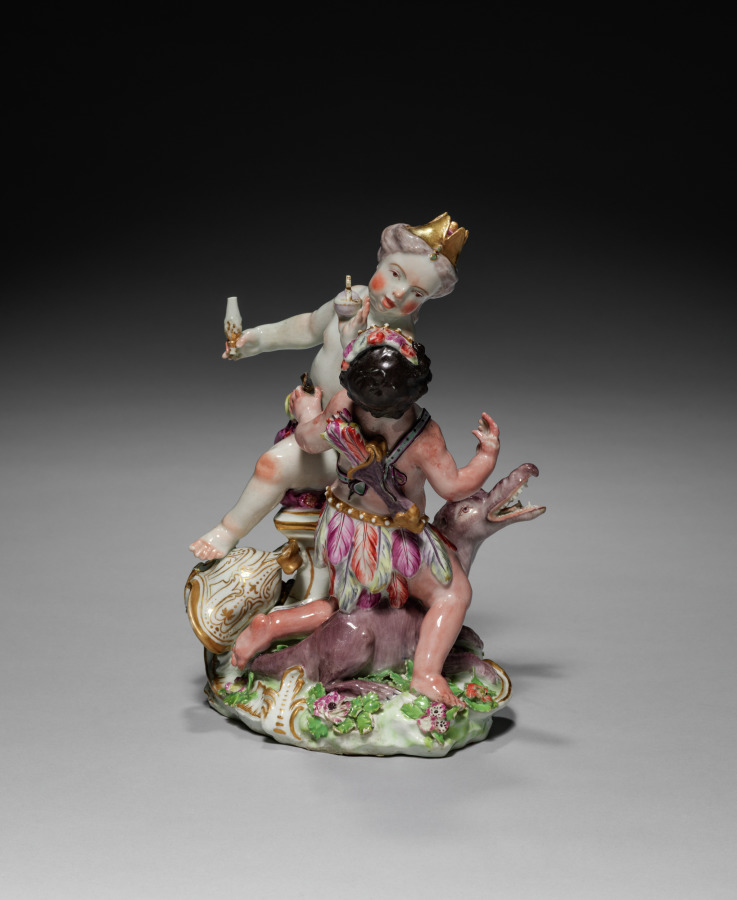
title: Figure of Europe and America from the Four Continents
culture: England, Chelsea, mid-18th century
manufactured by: Chelsea Porcelain Factory (Britain, London, 1745–84)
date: c. 1760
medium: soft-paste porcelain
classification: Ceramic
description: Often collected by wealthy British merchants who were beneficiaries of colonial expansion, figural groups were frequently part of elaborate table decorations meant to signify wealth and global dominance. Here, Europe is seen holding an orb and wearing a crown as queen of the world, suggesting Europe’s supremacy over the other continents. She is entangled with America, who is wearing feathers with a bow and arrow at her feet. This depiction of America reveals a purely imagined understanding of faraway places.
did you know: Figural representations of the four continents date back to the 1500s, but such imagery became even more popular in the 1700s as European empires expanded.